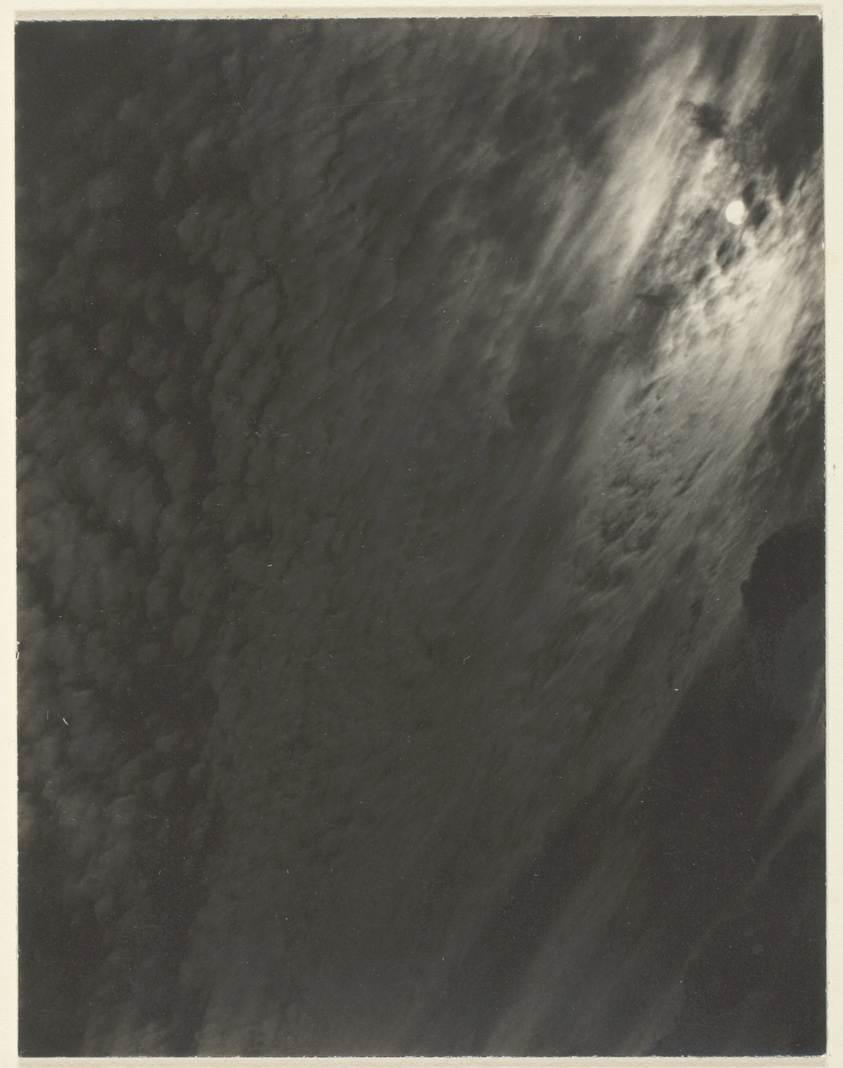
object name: Photograph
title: Equivalent, from Set A (Third Set, Print 6)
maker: Alfred Stieglitz (American, 1864–1946)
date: 1929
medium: Gelatin silver print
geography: United States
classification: gelatin silver (developing-out-paper) pr; photographic process; photography; photograph